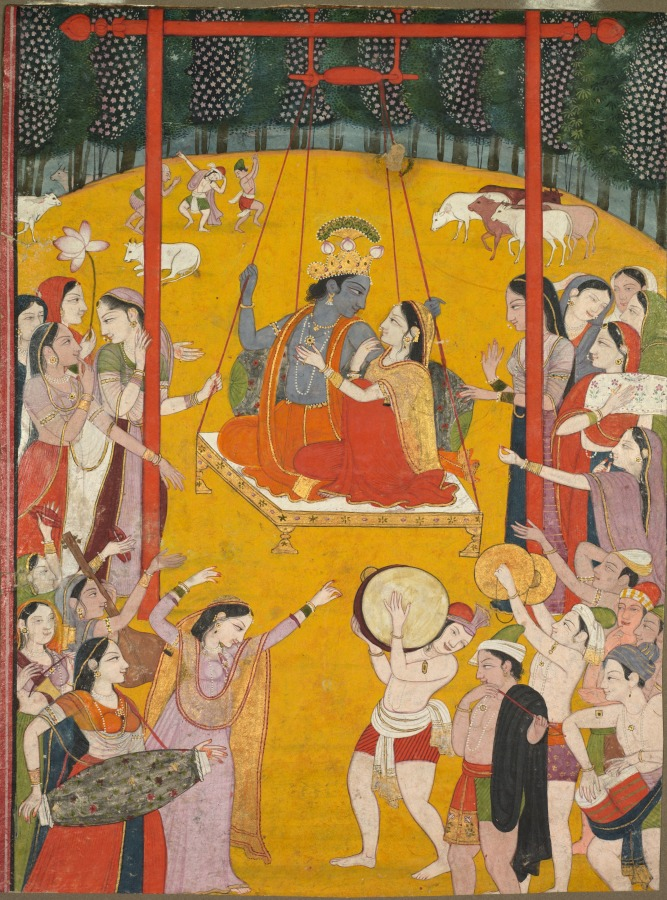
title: Hindola Raga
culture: Northern India, Pahari kingdoms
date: c. 1790–1800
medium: Gum tempera and gold on paper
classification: Painting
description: To celebrate the coming of spring, Krishna sits on a swing with his beloved Radha as their companions, the cowherd boys and milkmaids, play music, dance, admire the idyllic couple, and keep their swing gently in motion. In Sanskrit, hindola means swing, and this painting belonged to a set of ragas, which are paintings associated with a musical mode. Music played in the Hindola Raga elicits the fever of young love in springtime. Radha and Krishna represent the ideal of a young couple in love.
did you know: The word hindola means "swing" in Sanskrit.